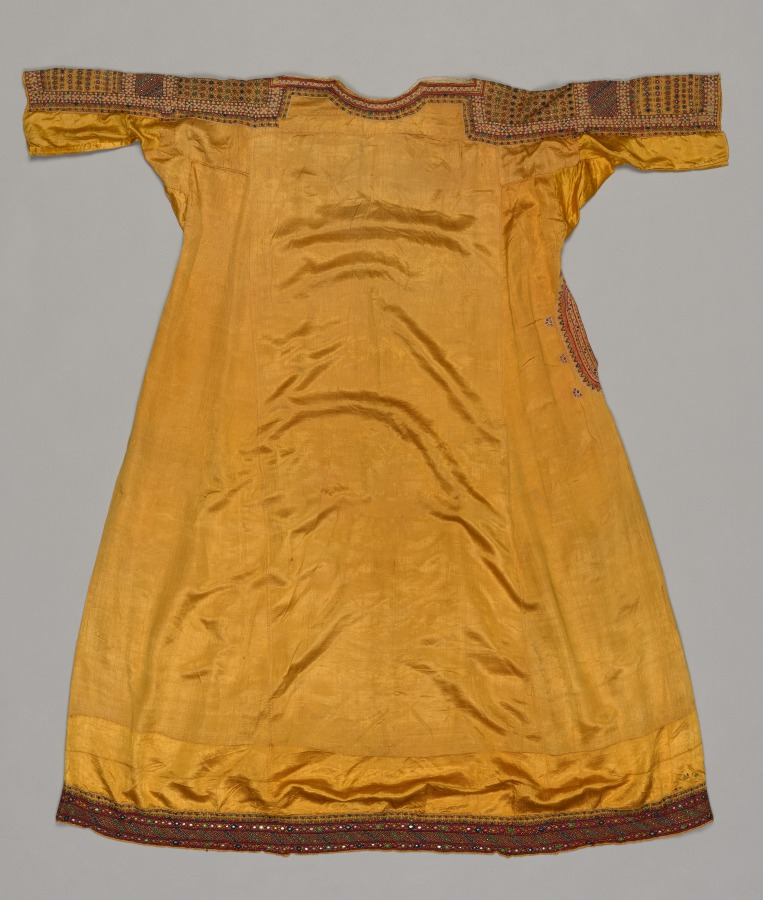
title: Woman's Costume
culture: Western India, Gujarat, Kachchh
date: 1800s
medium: embroidery, silk, embroidery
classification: Garment